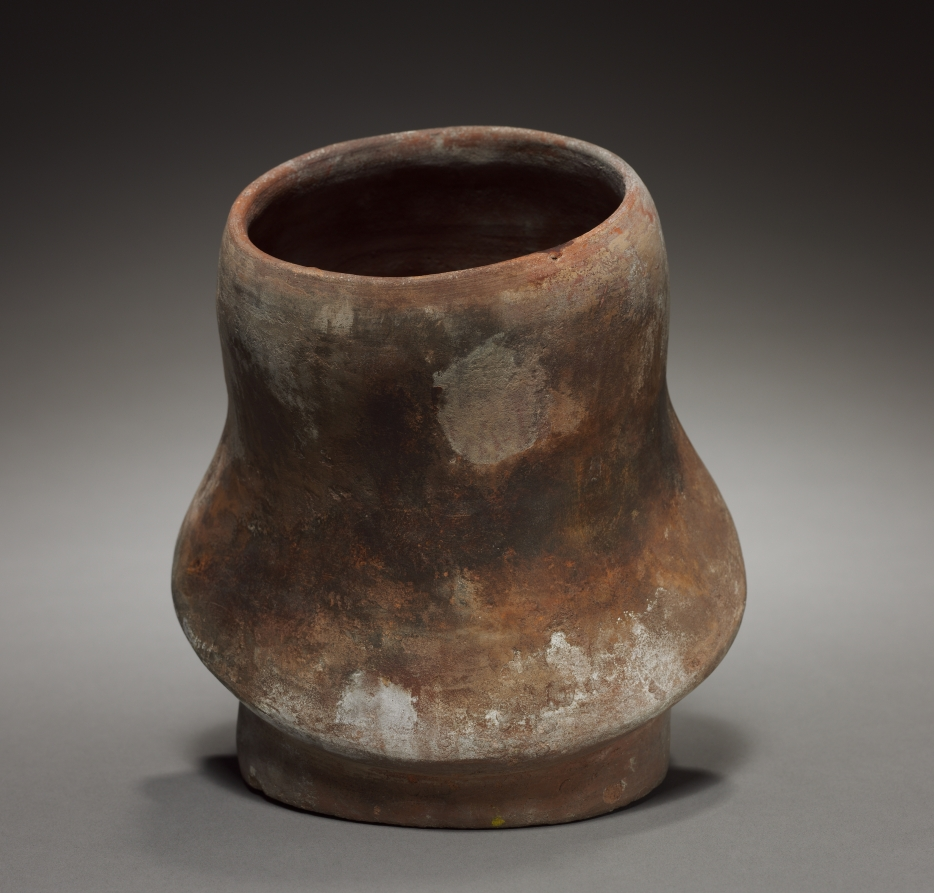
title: Vase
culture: Peru, Mochica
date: before 1930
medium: pottery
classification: Ceramic